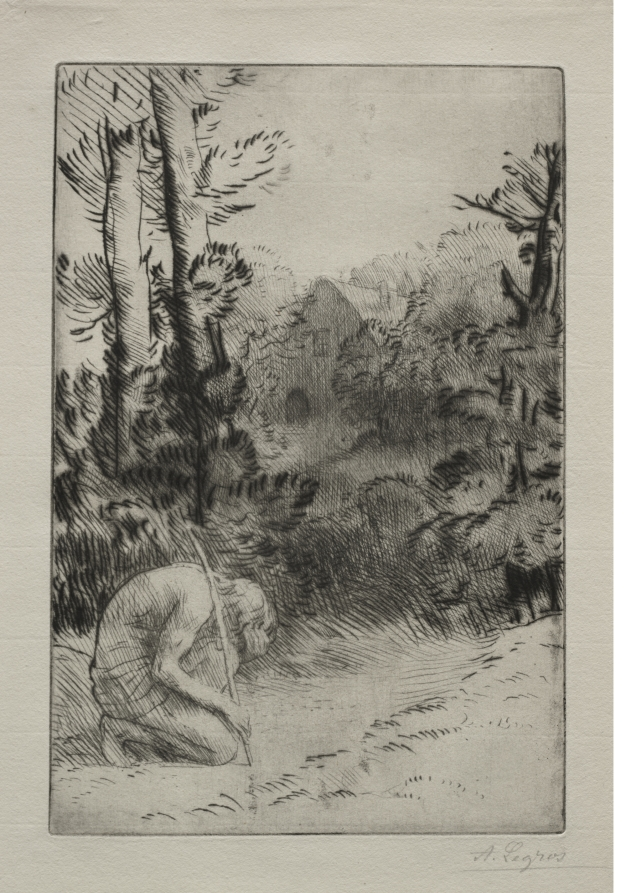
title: The Prodigal Son (2nd Plate)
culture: France, 19th-20th century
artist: Alphonse Legros (French, 1837–1911)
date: c. 1857–1911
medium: etching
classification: Print